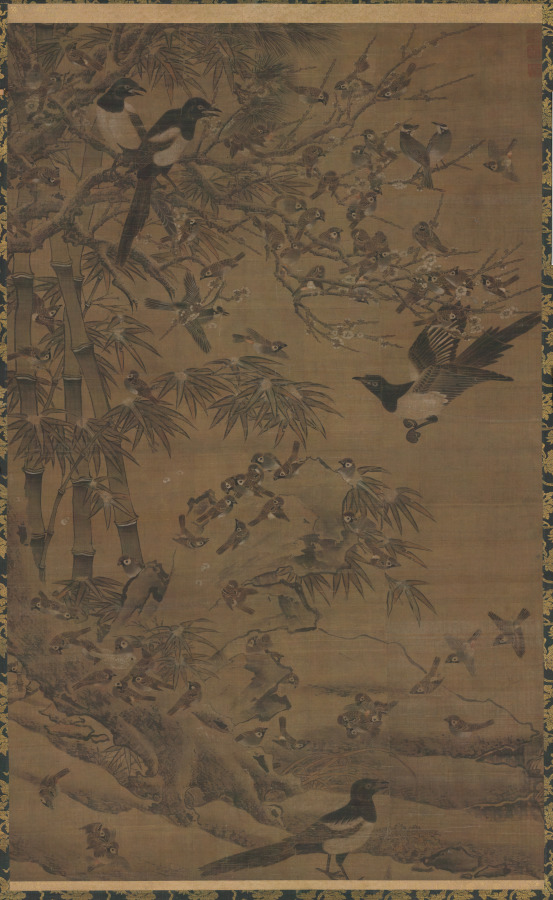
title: A Hundred Birds and the Three Friends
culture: China, Ming dynasty (1368–1644)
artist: Bian Wenjin (Chinese, about 1354–1428)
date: 1400–1425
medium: hanging scroll; ink and color on silk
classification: Painting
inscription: Artist's three seals: Pien yin Ching-chao; Sha-yang shih-chia; Ch'in shu ch'ing-lo.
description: In this hanging scroll birds rest and frolic among pines, bamboo, and flowering plum, plants known as “the three friends.” Due to their endurance in winter, they symbolize perseverance and friendship in adverse times. The naturalistic depiction of the birds refers to the bird-and-flower painting tradition of the Art Academy of the Song dynasty. The painter Bian Wenjin served at the court of the Ming dynasty Yongle Emperor (reigned 1402–24). This painting may have been hung in a private studio or palace hall on appropriate occasions.